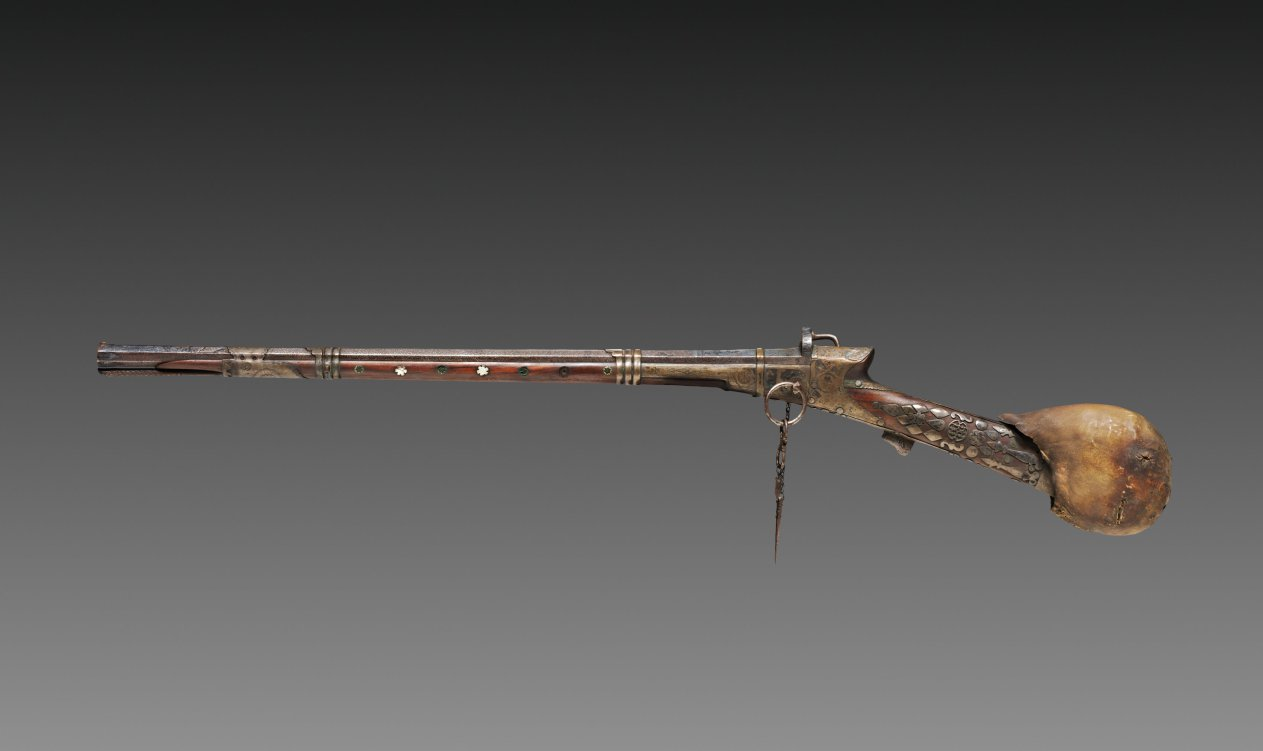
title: Matchlock Musket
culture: Turkey, Ottoman period (1299–1922)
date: c. 1750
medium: Wood, steel, brass, mother-of-pearl inlay, and leather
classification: Arms and Armor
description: Collectively, the Safavid, Mughal, and Ottoman empires are known as the Gunpowder Empires. Particularly from the 1500–1700s, they were among the strongest economic, cultural, and militaristic powers. Each trained and equipped their armies with the latest gunpowder firearms, particularly cannons and muskets. While used in battle, muskets were also used for leisure activities, particularly hunting. The decoration on this musket suggests it was a courtly item, fitted with a leather pad to protect the shooter from the force of the explosion after firing.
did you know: A matchlock musket was loaded from the muzzle end with a scouring stick kept in a sleeve on the underside of the barrel.